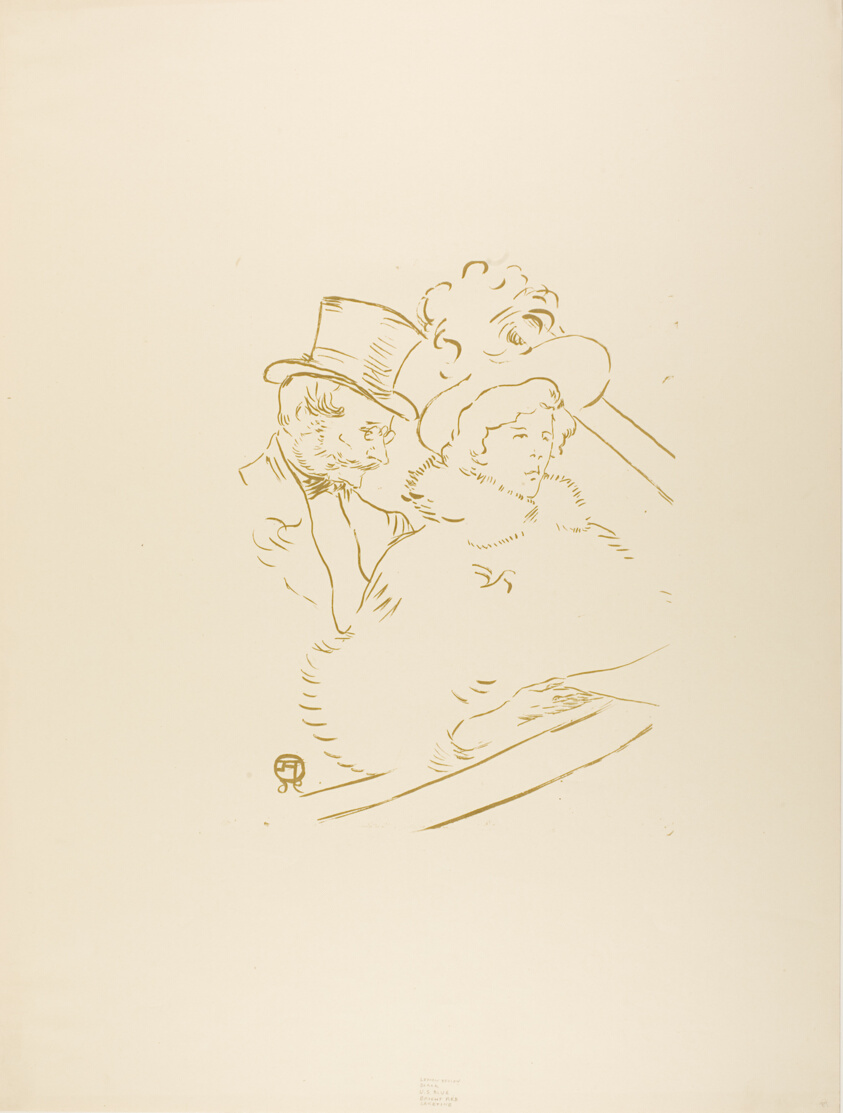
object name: Print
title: At the Concert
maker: Henri de Toulouse-Lautrec (French, 1864-1901)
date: 1896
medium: Zincograph on cream wove paper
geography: France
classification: zincograph; print; prints and drawing